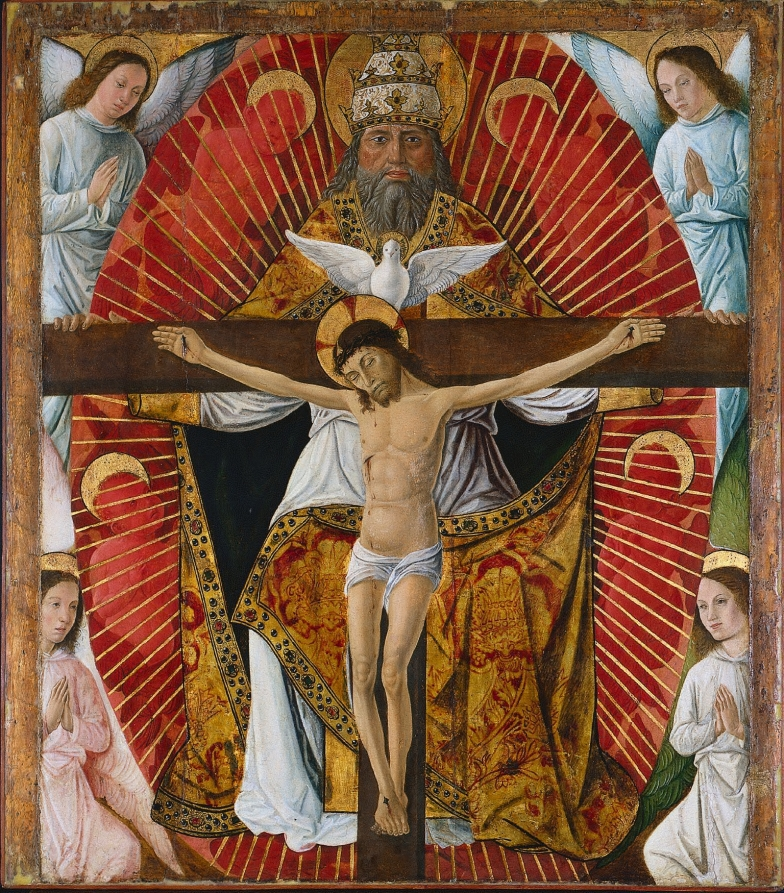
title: The Trinity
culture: France, Lyon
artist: Laurent Girardin (French, 1478)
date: c. 1460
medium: oil on wood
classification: Painting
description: Fundamental to Christian belief, the Holy Trinity refers to the three divine persons in God—God the Father, here depicted wearing a papal tiara, God the Son, crucified on the cross, and the Holy Spirit, represented as a dove. Juxtaposed with the Trinity's austere depiction are cherubim bathed in radiant red light, possibly influenced by stained glass windows that Girardin also designed in Lyon. God the Father wears a liturgical vestment, a sumptuous and bejeweled cope, or cape, fastened below the neck, typically worn by clergy for processional occasions. It is made of opulent crimson velvet with gold thread forming a large pomegranate pattern.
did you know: When the painting was acquired in 1960 the artist was not yet identified.